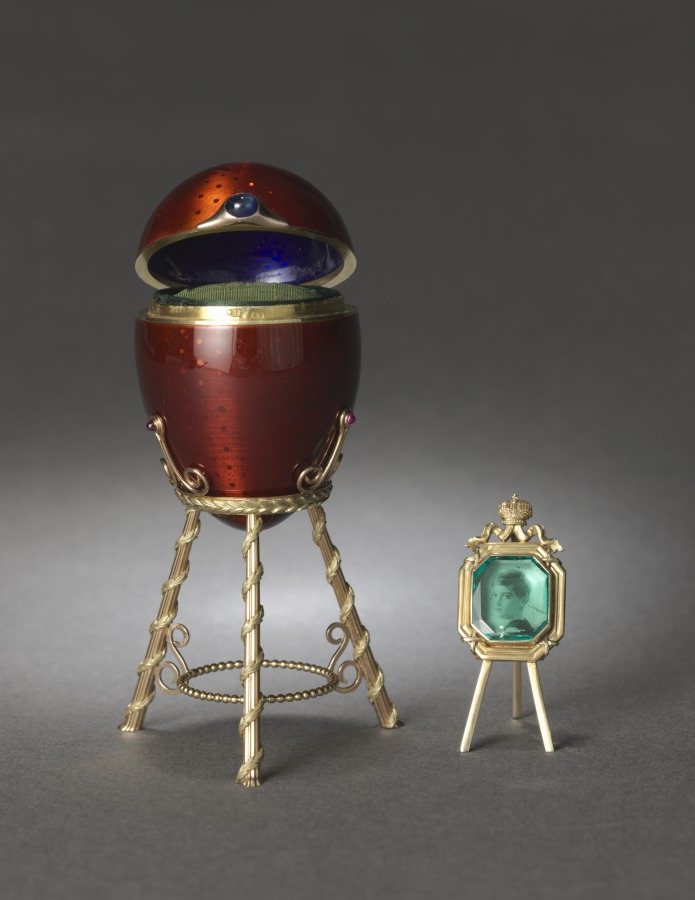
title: Egg on Stand with Easel and Photograph of Tsarevich Alexei Nikolaievich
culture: Russia, St. Petersburg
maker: Alexander Edward Tillander (Russian, 1837–1918)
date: c. 1890–1896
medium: gold, enamel, sapphire, gold easel and stand, paper, faceted green glass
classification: Miscellaneous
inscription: engraved beneath the enamel of the top are the Cyrillic letters "XB" [in monogram] which signify the phrase, "Christ is risen."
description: In the Russian Orthodox religious tradition, eggs are offered as Easter gifts to symbolize rebirth, renewal, and the resurrection of Christ. This jeweled Russian egg is engraved with XB symbolizing the phrase, “Christ is risen,” and would have been given to a lady in a wealthy household, perhaps someone of high rank within the imperial court, given the richness of materials.